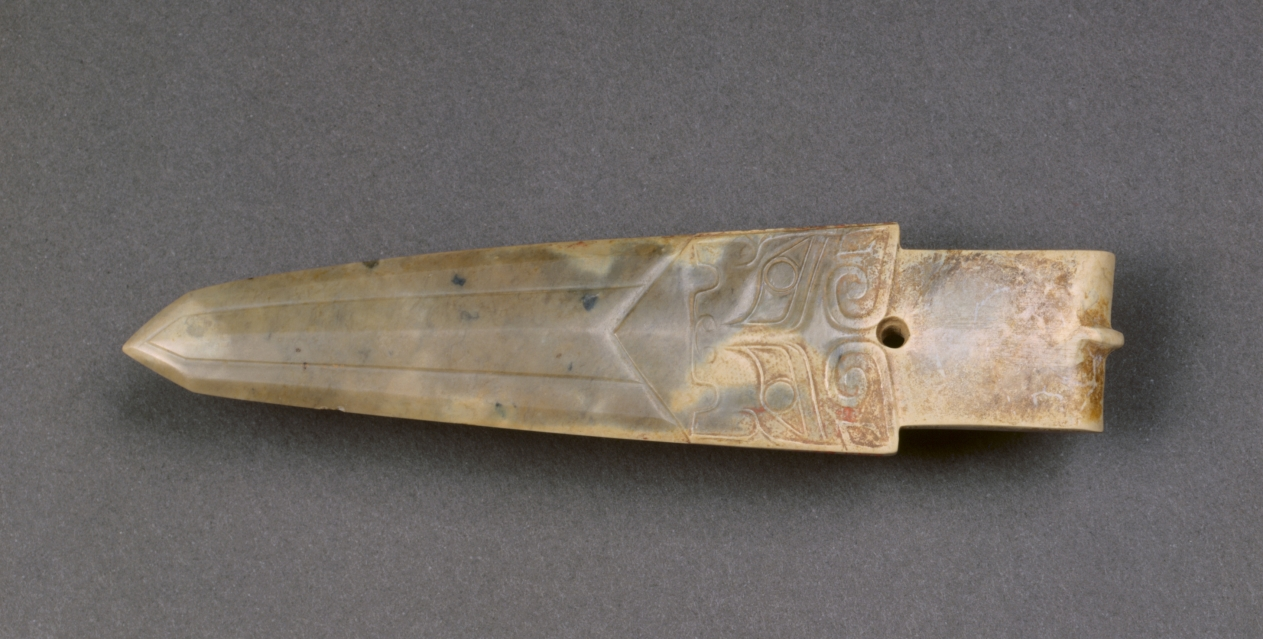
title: Ceremonial Dagger-Axe with Animal Masks (Ge)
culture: China, Shang dynasty (c. 1600–c. 1046 BCE)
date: c. 1600–1050 BCE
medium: jade (nephrite)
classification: Jade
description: Jade is an extremely hard material. In ancient China, it was carved or ground with fine abrasives, such as quartz sand, affixed to cutting or drilling tools. The form of this jade (ge, ceremonial dagger axe), was likely derived from similarly shaped bronze weapons. The pointed and slightly curved blade was symmetrically carved. It seems to emerge from the mouth of the taotie, the animal mask. The taotie’s curved horns were carved in relief bands; its eyes, snout, and upper jaw are delineated in threadlike relief. Similar taotie designs are also seen on bronze vessels of the same period. The hole in the tang indicates where the blade was originally attached to a wooden shaft.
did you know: Traces of vermilion or cinnabar remain on the taotie mask design.